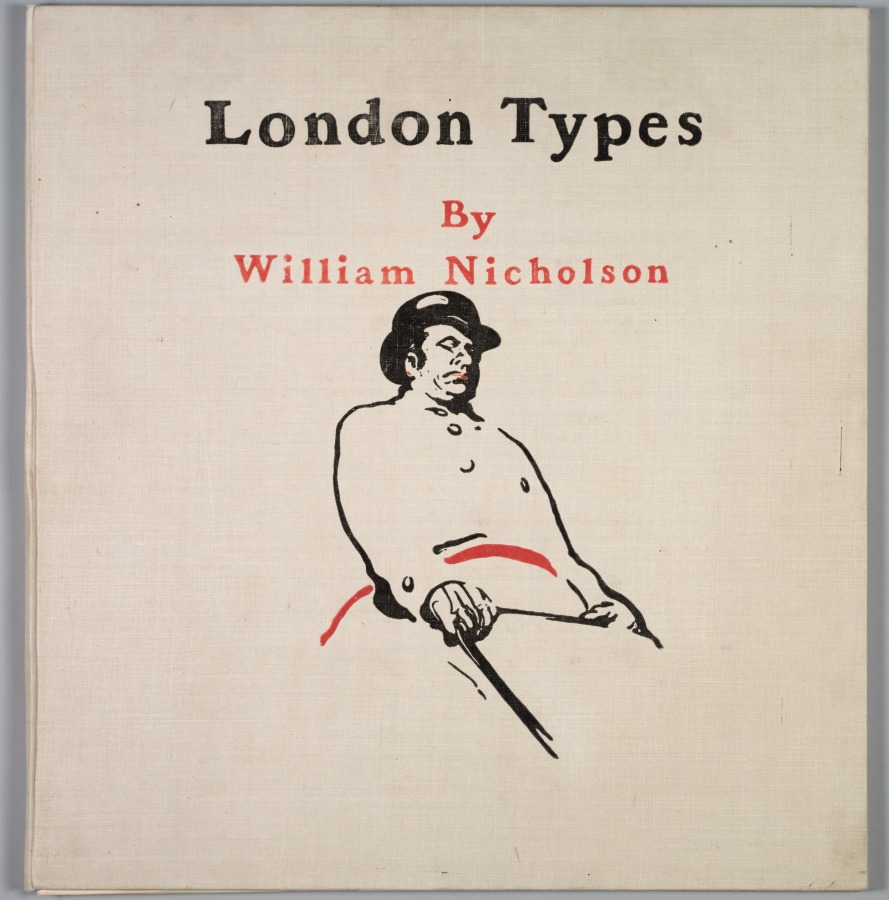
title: London Types: Cover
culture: England, 19th century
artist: William Nicholson (British, 1872–1949)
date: 1898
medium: original cloth portfolio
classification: Portfolio